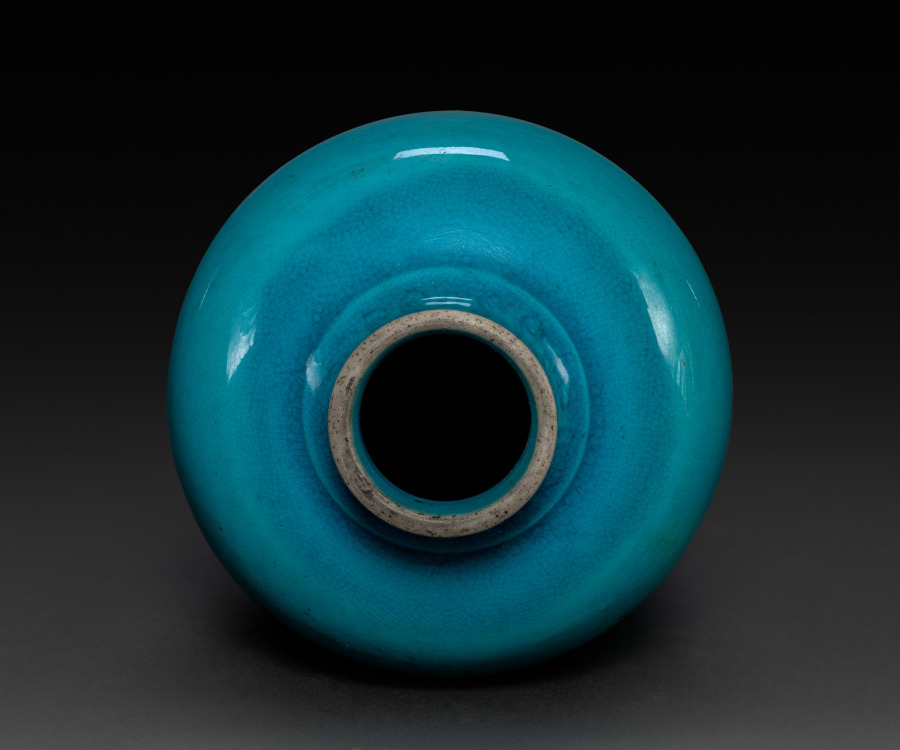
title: Vase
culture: China, Qing dynasty (1644-1911), Kangxi reign (1662-1722)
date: 1662–1722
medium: porcelain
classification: Ceramic